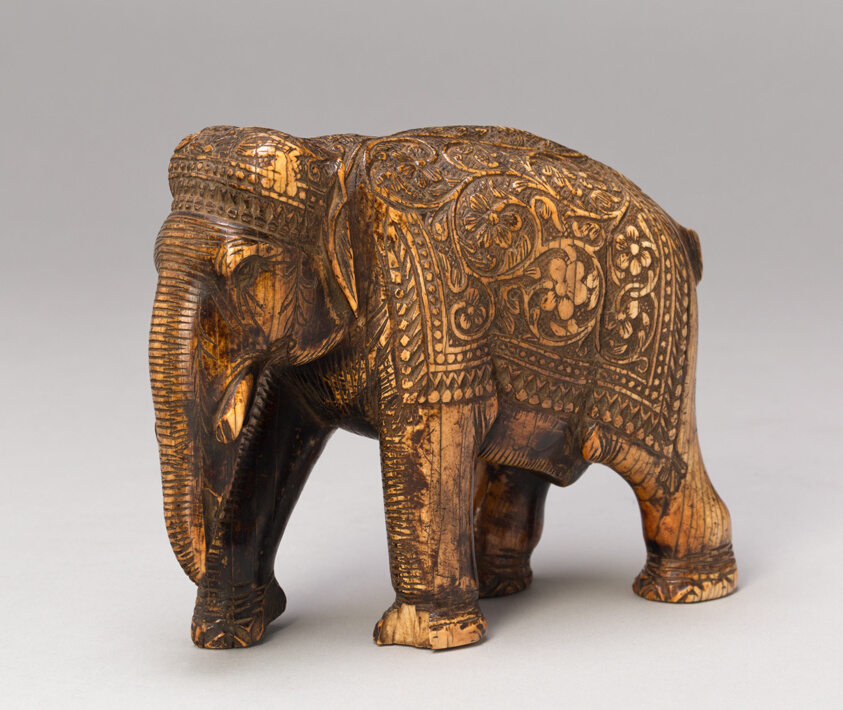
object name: Decorative Arts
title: Walking Elephant with Floral Caparison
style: South Asian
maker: India; Deccan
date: 17th century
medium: Ivory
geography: Deccan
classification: ivory; sculpture; asian art; decorative arts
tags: animals